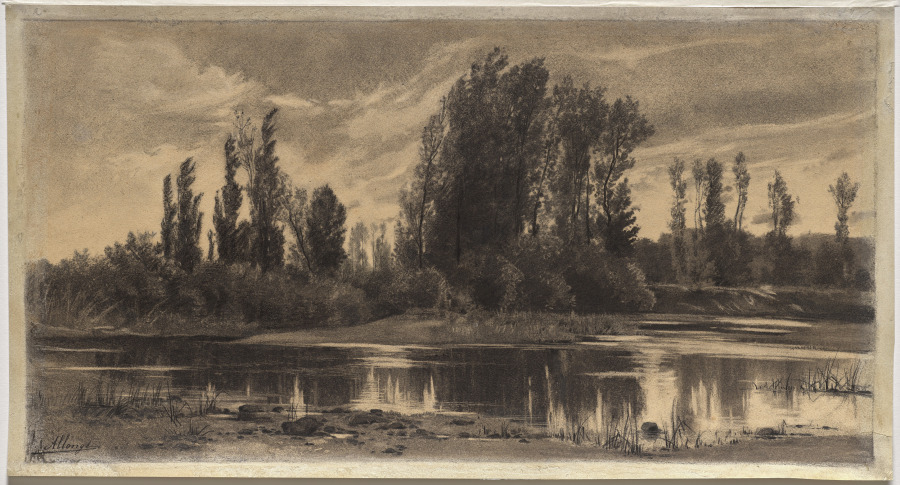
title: Gust of Wind on the Poplars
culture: France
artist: Auguste Allongé (French, 1833–1898)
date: c. 1873–80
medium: charcoal on wove paper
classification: Drawing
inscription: Signed, in black ink, lower left: Allongé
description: At a time when most landscape artists favored dramatic Italian views, Auguste Allongé depicted the terrain of his native France and especially the forest of Fontainebleau, outside Paris. This sheet shows poplar trees along a river, bending slightly with the suggestion of a breeze. Allongé worked traditionally with charcoal, drawing on paper, but also removed the material throughout using a stump to create highlights and dramatic tonal variation.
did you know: Auguste Allongé was known for the complex charcoal techniques used in this drawing, and in fact derived a large part of his fame from Le Fusain, a manual for drawing with charcoal published in 1873 and translated into several languages over the following decade.